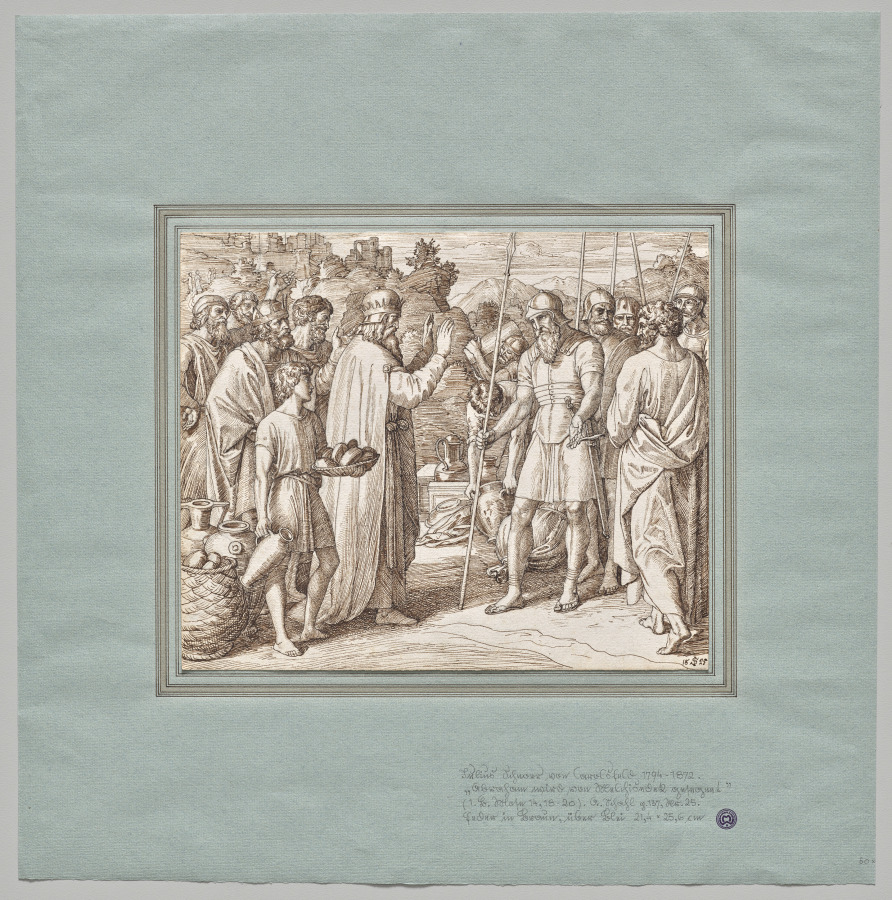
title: Melchizedek Blessing Abraham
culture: Germany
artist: Julius Schnorr von Carolsfeld (German, 1794–1872)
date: 1825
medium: pen and brown ink mounted on blue laid paper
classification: Drawing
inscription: Signed and dated, lower right, in brown ink: 18JS25; inscribed (in later hand in Sütterlin), lower right on mount, in graphite: Julius Schnorr von Carolsfeld 1794 – 1872. / “Abraham wird von Melchisidek gesegnet.” / (1. B. Mose 14, 18-20). [A. Schahl s. 137, nr. 25] / Feder in Braun, über Blei, 21,4 x 25, 6 cm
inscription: Collector's stamp (Walter Moraw): Sammlung MW (not in Lugt)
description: Julius Schnorr von Carolsfeld was an important figure within the Romantic movement that spread throughout Germany in the early 1800s. He was a member of the Nazarenes, a loosely formed group of young artists who rejected their conservative training in favor of a restrained style that they hoped would spiritually elevate those who viewed it. Schnorr von Carolsfeld is best known today for the Picture Bible, an expansive series of drawings created as illustrations for episodes from scripture. This drawing presents a scene from the Book of Genesis, evoking a dramatic episode with a restrained style characteristic of the Nazarenes’ work around this time.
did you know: The Picture Bible, the series to which this drawing belongs, was originally a group project conceived by Julius Schnorr von Carolsfeld and the Nazarenes, but he took over execution of the project around 1824.